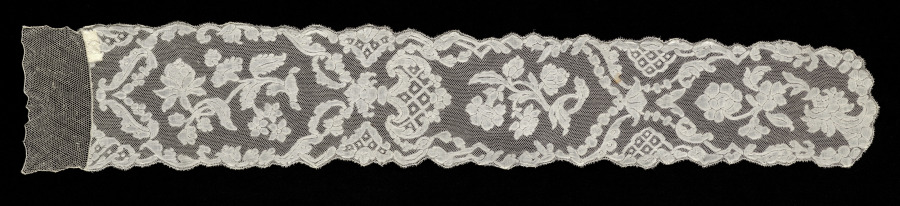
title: Lace Lappet (one of a pair)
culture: France, Valenciennes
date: 1740–60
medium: Linen: bobbin lace (Valenciennes)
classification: Lace